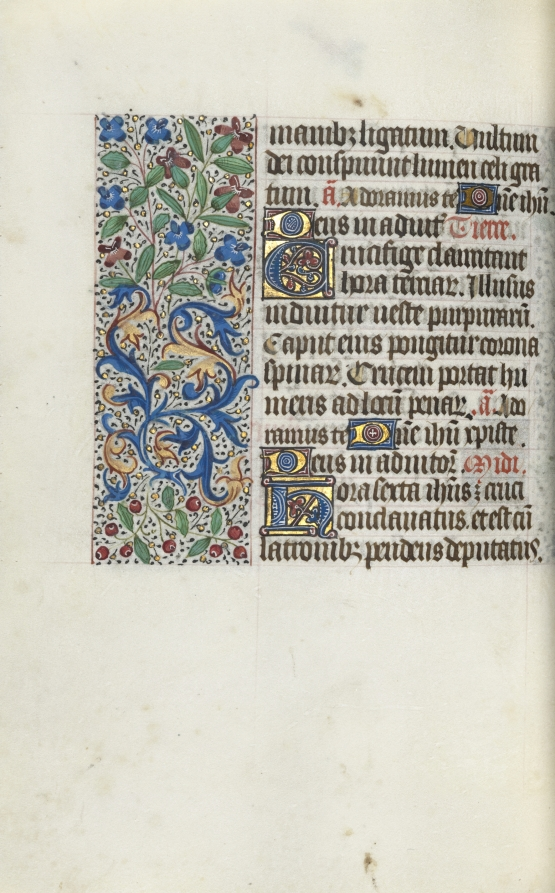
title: Book of Hours (Use of Rouen): fol. 97v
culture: France, Rouen, 15th century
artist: Master of the Geneva Latini (French, active Rouen, 1460–80)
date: c. 1470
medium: ink, tempera, and gold on vellum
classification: Bound Volume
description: In the late 1400s and early 1500s Rouen was an established and important center of book production. The city’s cathedral had a wealthy chapter that spent large sums of money to commission books and to maintain its extensive library. The stationers and booksellers would have likely been concentrated in or near the cathedral precinct. This artist, named after a manuscript now in Geneva, was Rouen’s principal illuminator during the second half of the 1400s.